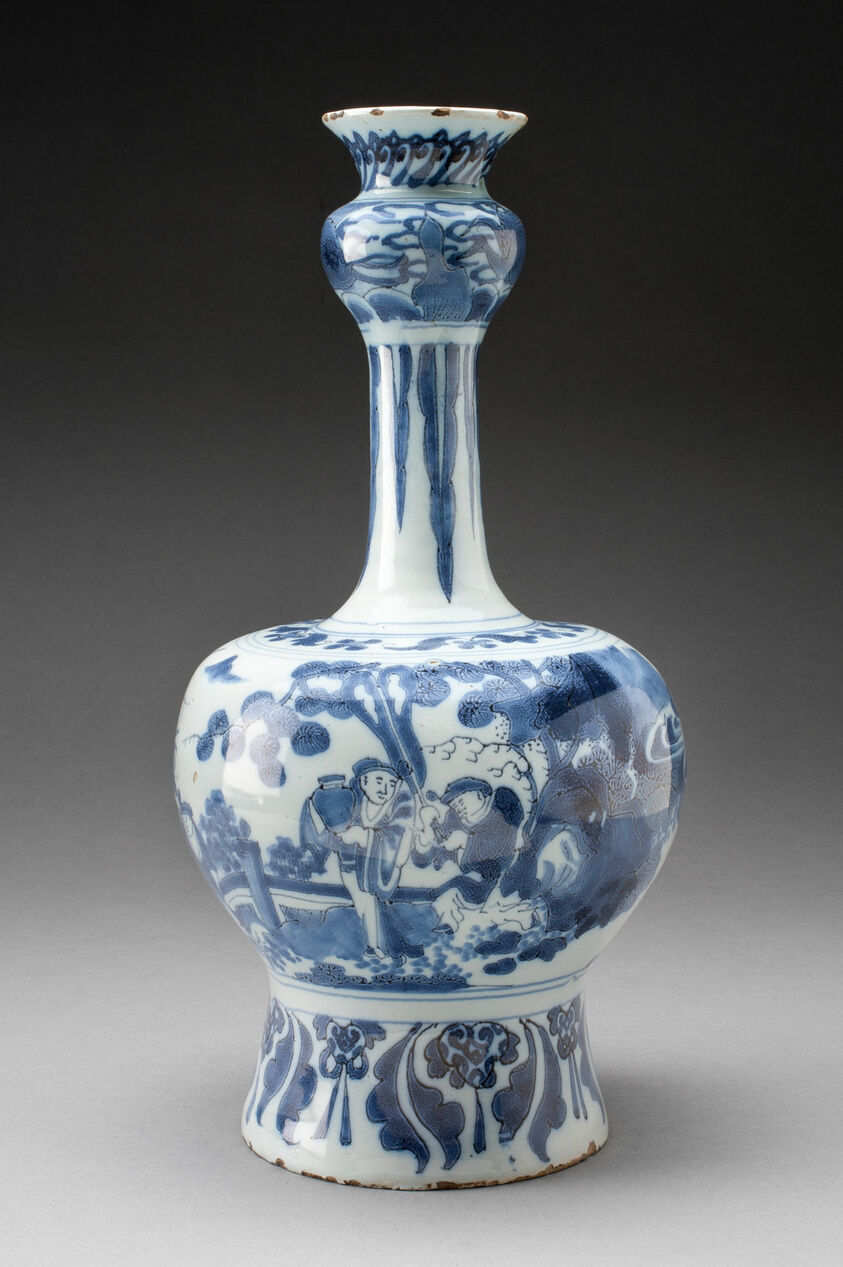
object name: Ceramics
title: Bottle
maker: Delft, Netherlands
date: c. 1690–1700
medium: Tin-glazed earthenware (Delftware)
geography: Delfland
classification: vase; earthenware; vessel; european decorative arts; ceramics